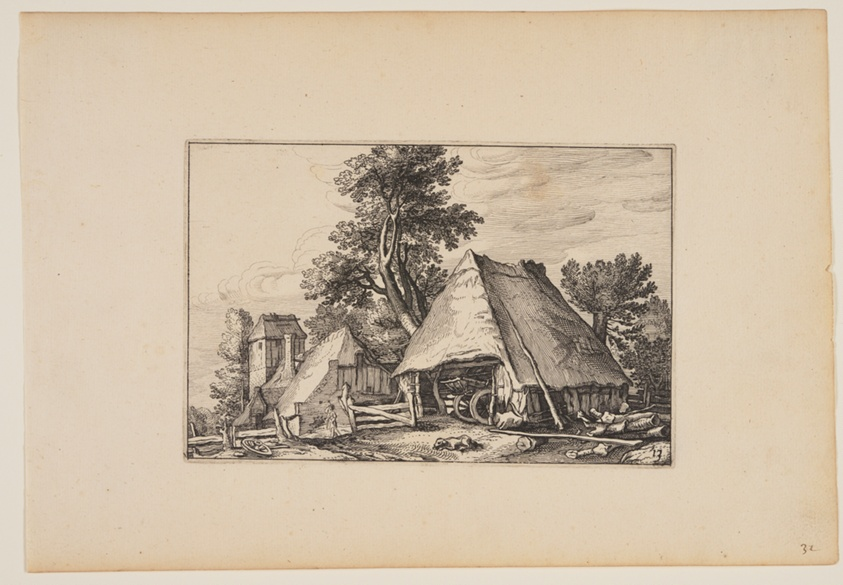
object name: Print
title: Farm with Shed for a Cart, from Landscapes (Verscheyden aerdige Lanthuysen...)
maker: Claes Jansz. Visscher (Netherlandish, c. 1550–c. 1612); after Abraham Bloemaert (Dutch, 1566–1651)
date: 1620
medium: Etching on ivory laid paper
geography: Netherlands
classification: print; paper; prints and drawing; etching